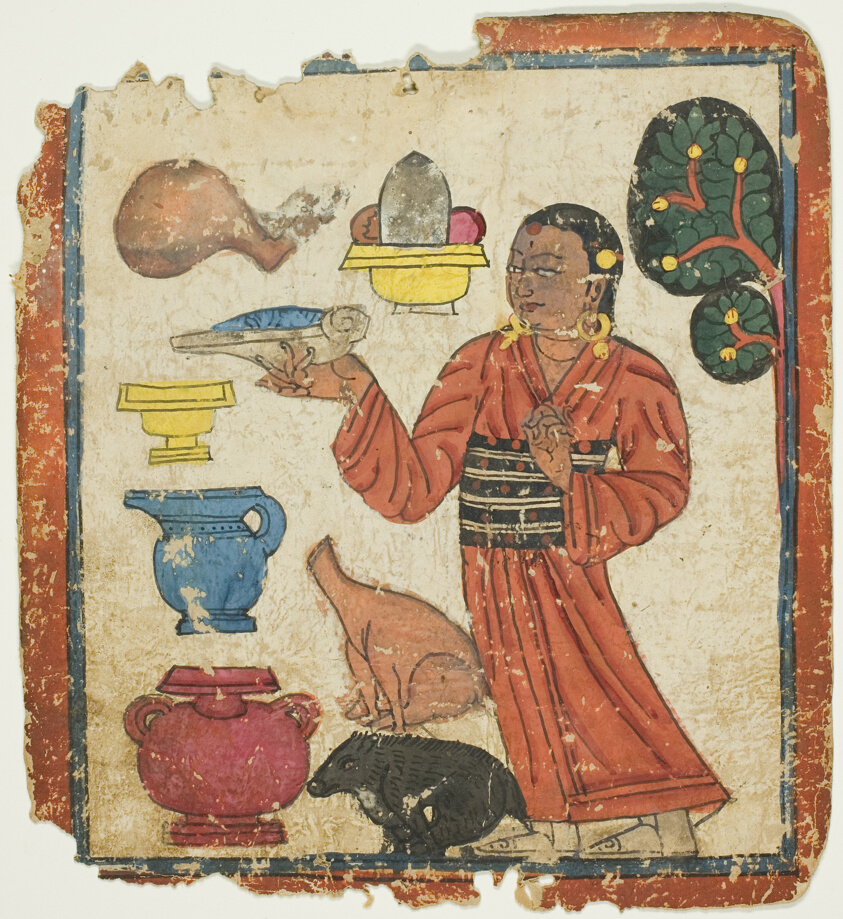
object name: Painting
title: Presentation of Offerings, from a Set of Initiation Cards (Tsakali)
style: Himalayan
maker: Southern Tibet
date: 14th/15th century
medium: Ink and watercolor on paper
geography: Tibet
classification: ink; painting